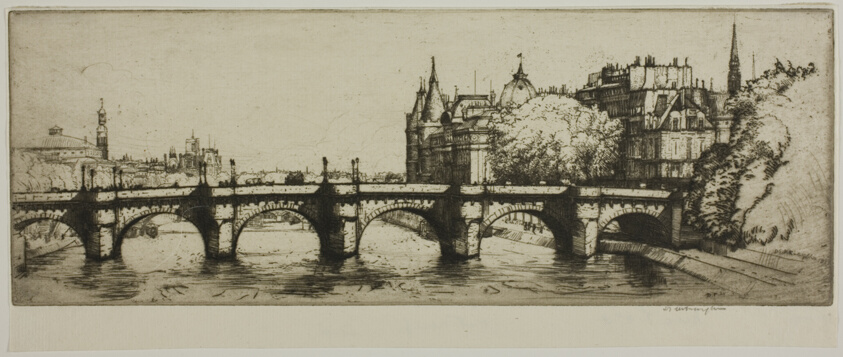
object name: Print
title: Le Pont Neuf, Paris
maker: Donald Shaw MacLaughlan (American, born Canada, 1876-1938)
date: 1907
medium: Etching in black on cream laid paper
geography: United States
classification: etching; print; prints and drawing